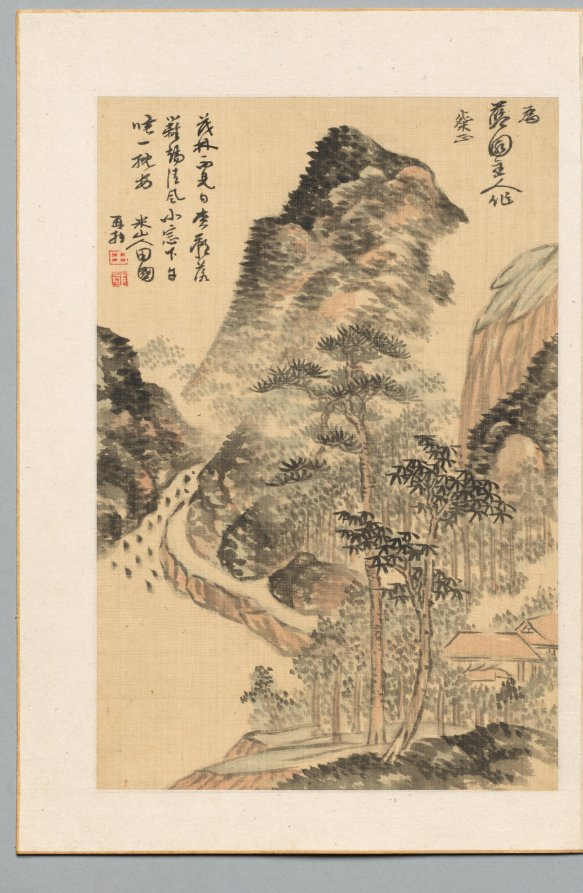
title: Short Nap on a Long Summer Day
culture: Japan, Edo period (1615–1868)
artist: Okada Beisanjin (Japanese, 1744–1820)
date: late 1700s-early 1800s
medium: leaf from a pair of folding albums; ink and light color on paper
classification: Portfolio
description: The Nanga, or "Southern School" painters of 17th- and 18th-century Japan were greatly influenced by Chinese culture. The subjects and styles of their work reflected the contemporary Japanese taste for imported Chinese objects and learning. A common practice among Nanga painters was the exchange of small paintings and calligraphies. They also celebrated special gatherings of artist-friends by producing individual sheets that were then gathered together in albums. The sheets shown here were part of such a gathering.